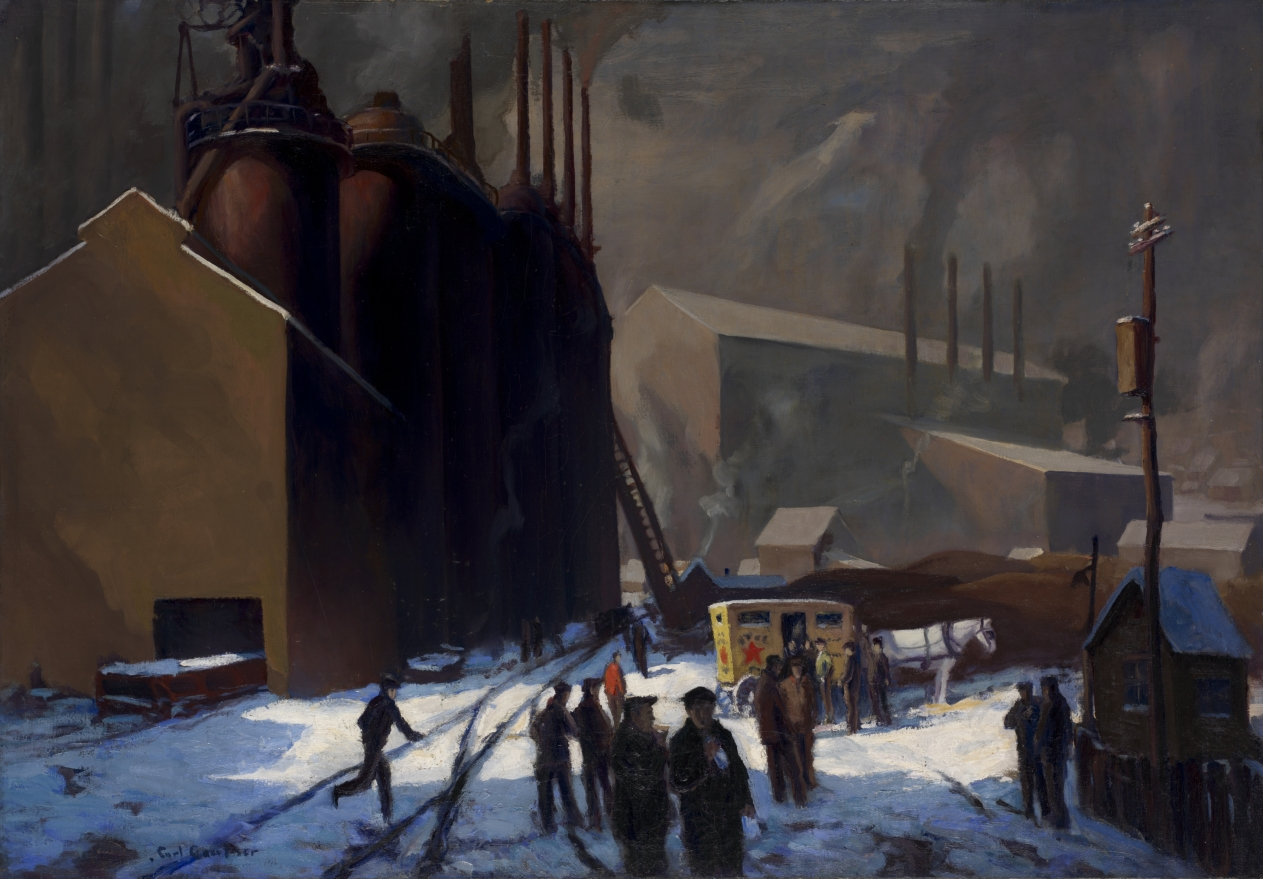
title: The Pie Wagon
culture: America, Ohio, Cleveland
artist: Carl Gaertner (American, 1898–1952)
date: c. 1926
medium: oil on canvas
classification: Painting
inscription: signed lower left: Carl Gaertner.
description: One of the most widely exhibited artists working in Cleveland, Gaertner specialized in painting the city and its environs. His favored subjects include scenes of Cleveland’s industrial heyday, including The Pie Wagon. In this painting, the artist focused attention on the laborers who spend their lunch break milling around a horse-drawn bakery wagon in the shadows of the hulking factories.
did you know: Star Bakery—identified by the logo on the wagon—was a flourishing business in Cleveland at the time.